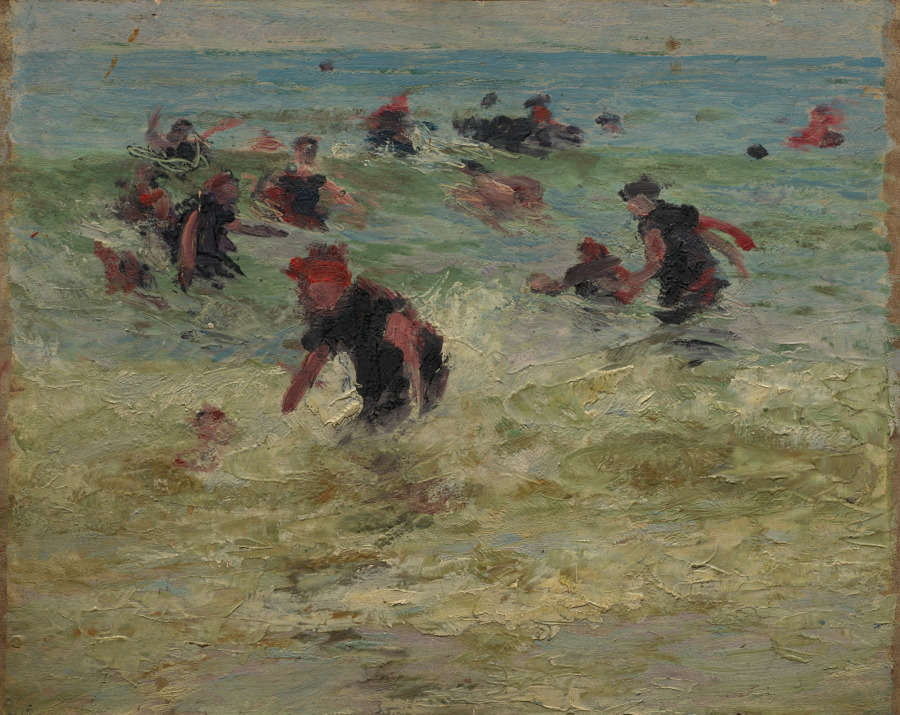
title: Beach Study (verso)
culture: America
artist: Edward H. Potthast (American, 1857–1927)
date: c. 1910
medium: oil on panel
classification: Painting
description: Born in Cincinnati, Potthast studied in Munich and Paris before returning to the United States, where he began spending summers along the coast of New England. There he studied the carefree seaside activities of bathers and picnickers. Although he never married, he was particularly fond of painting young mothers and their children.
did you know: During the early 1900s, modesty dictated women’s bathing suit designs featuring long, loose-fitting skirts.